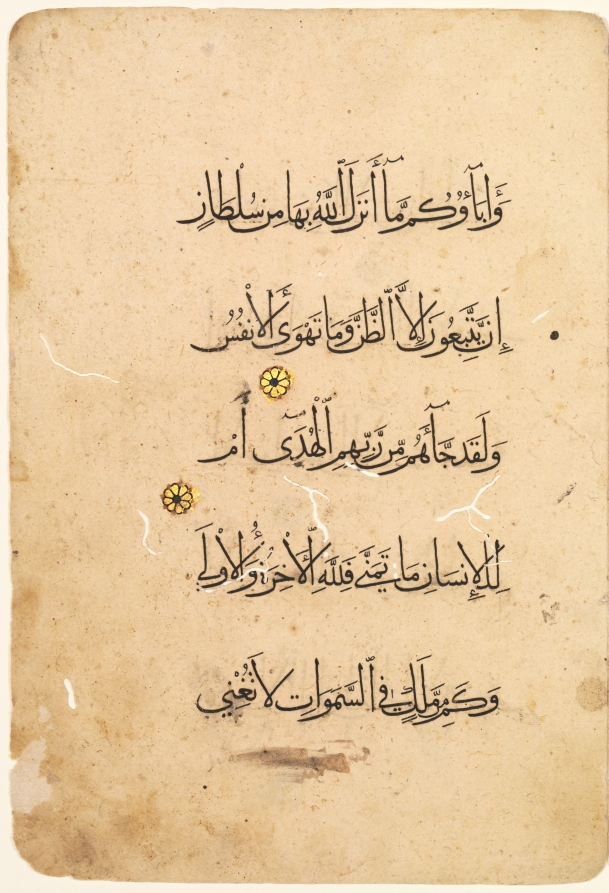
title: Qur'an Manuscript Folio (recto) (left side of bifolio)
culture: Egypt, Mamluk sultanate (1250–1517)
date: 1300s–1400s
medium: ink, gold, and colors on paper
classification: Drawing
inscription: Sura-al-Najm [The Stars] 53:part 23-part 26 (Arabic) Script: Muhaqqaq (five lines to a page)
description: It is through the Arabic language that the Qur’an was revealed to the Prophet Muhammad in the 600s. As a result, calligraphy is celebrated as the highest form in Islamic art. The verses (ayat) written here come from the 53rd chapter (surah) of the Qur’an, also known as the Surah An-Najm, the Chapter of the Star. The significance of the Qur’an provides an explanation for the importance of calligraphy, but its use was not restricted to religious texts. Many objects in the museum's Islamic collection bear calligraphic inscriptions and come from secular contexts, displaying the versatility and creativity of this art form.